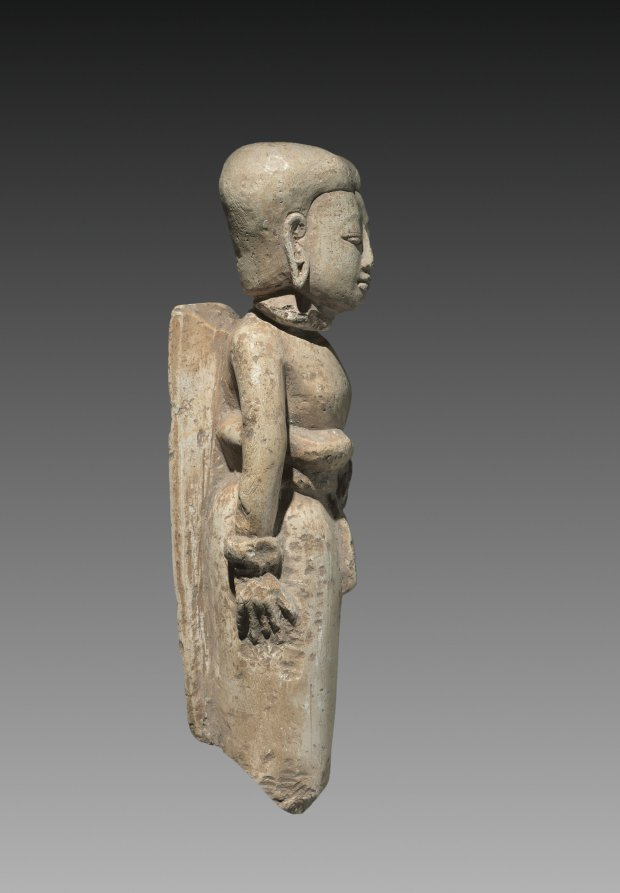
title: Female Figure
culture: Eastern Java, Majapahit Dynasty (1295-1478)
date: 1293–1478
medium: terracotta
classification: Sculpture